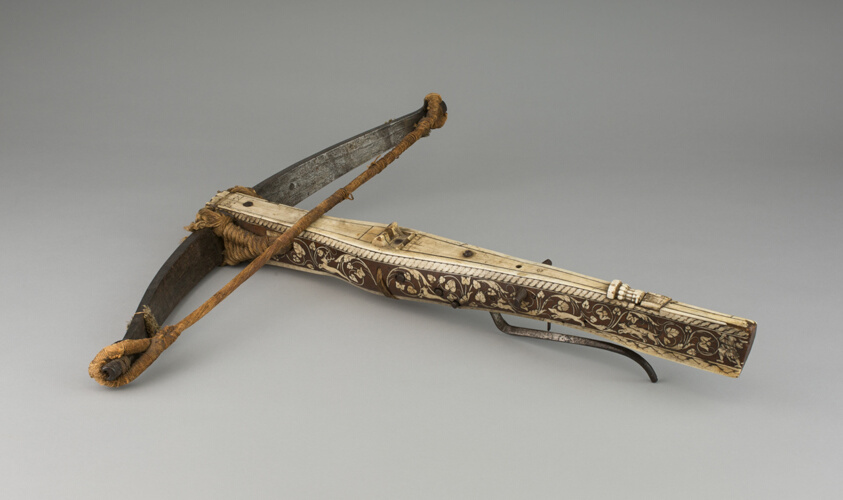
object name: Arms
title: Crossbow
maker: South German, Possibly Nuremburg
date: 1570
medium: Steel, fruitwood, staghorn, ivory, silk fiber, and hemp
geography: Nuremberg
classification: crossbow; arms; arms and armor